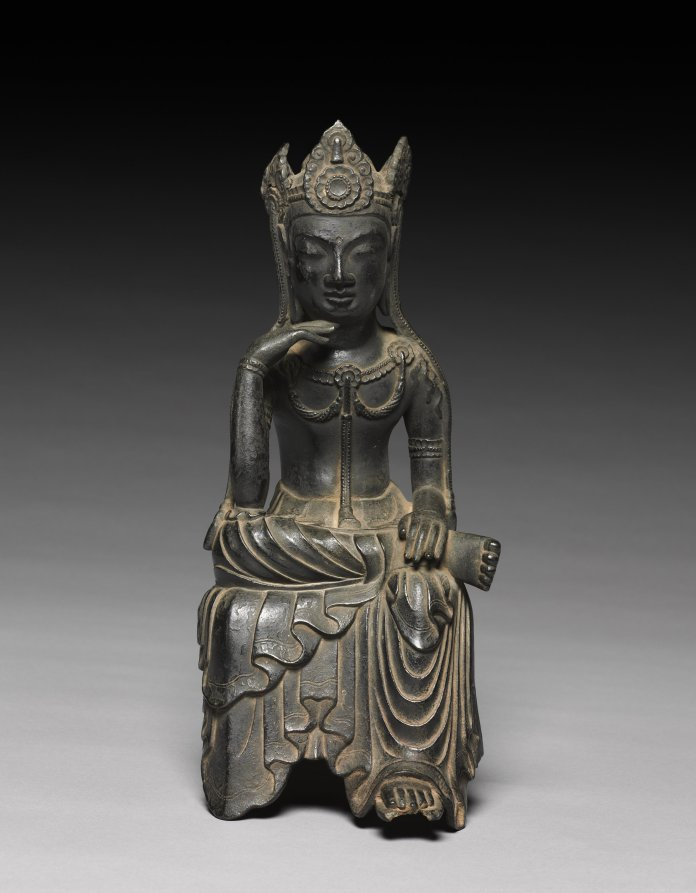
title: Buddha of the Future (Miroku Bosatsu)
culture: Japan, Asuka period (538–710)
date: late 600s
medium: cast bronze, incised, with traces of gilding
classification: Sculpture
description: Buddhism was introduced to Japan in the sixth century. For early Japanese devotees, Buddhism offered the promise of salvation through faith in the Buddha of the Future, who would appear at the end of the world. The concept of eternal salvation held particular resonance with the Japanese aristocracy, who became the staunchest supporters of this new faith. Small sculptures like this one, with its gentle grace and powerful presence, were popular devotional objects.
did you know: The Sanskrit name of this being, Maitreya, derives from the Sanskrit word for friend, mita.